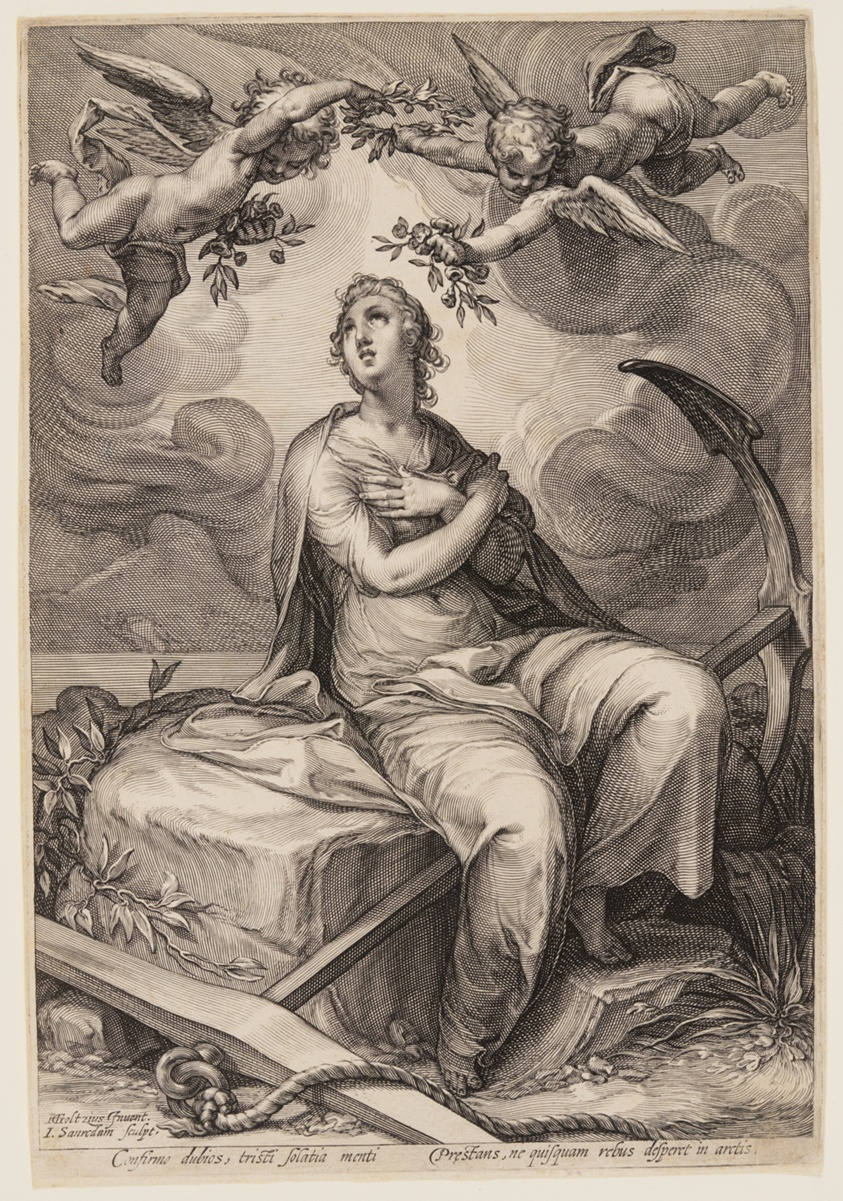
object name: Print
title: Hope, from Three Cardinal Virtues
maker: Jan Saenredam (Dutch, 1565–1607); after Hendrick Goltzius (Dutch, 1558–1617)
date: 1601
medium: Engraving on ivory laid paper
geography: Netherlands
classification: engraving; paper; print; prints and drawing